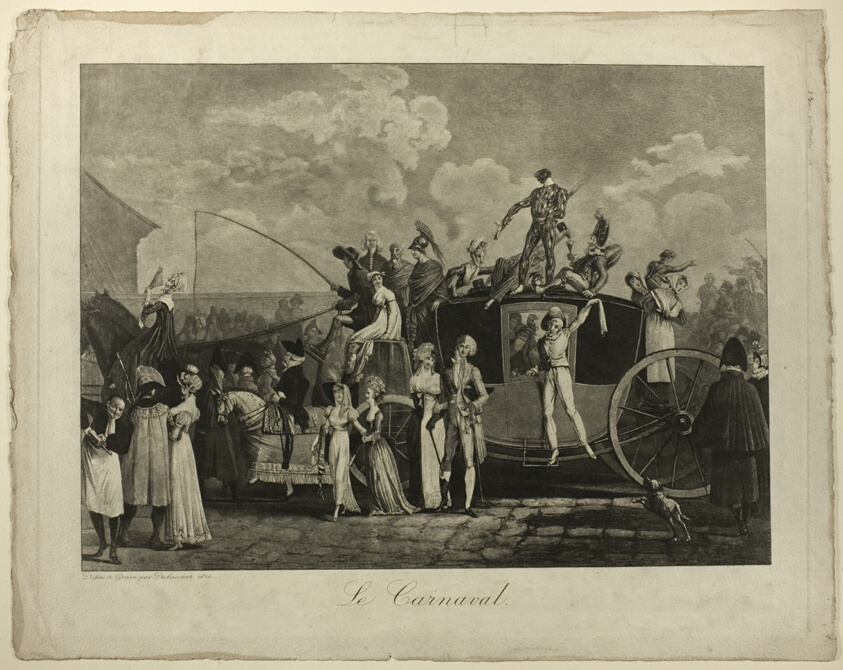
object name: Print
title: The Carnival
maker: Philibert Louis Debucourt (French, 1755-1832)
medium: Etching on paper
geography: France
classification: etching; print; prints and drawing